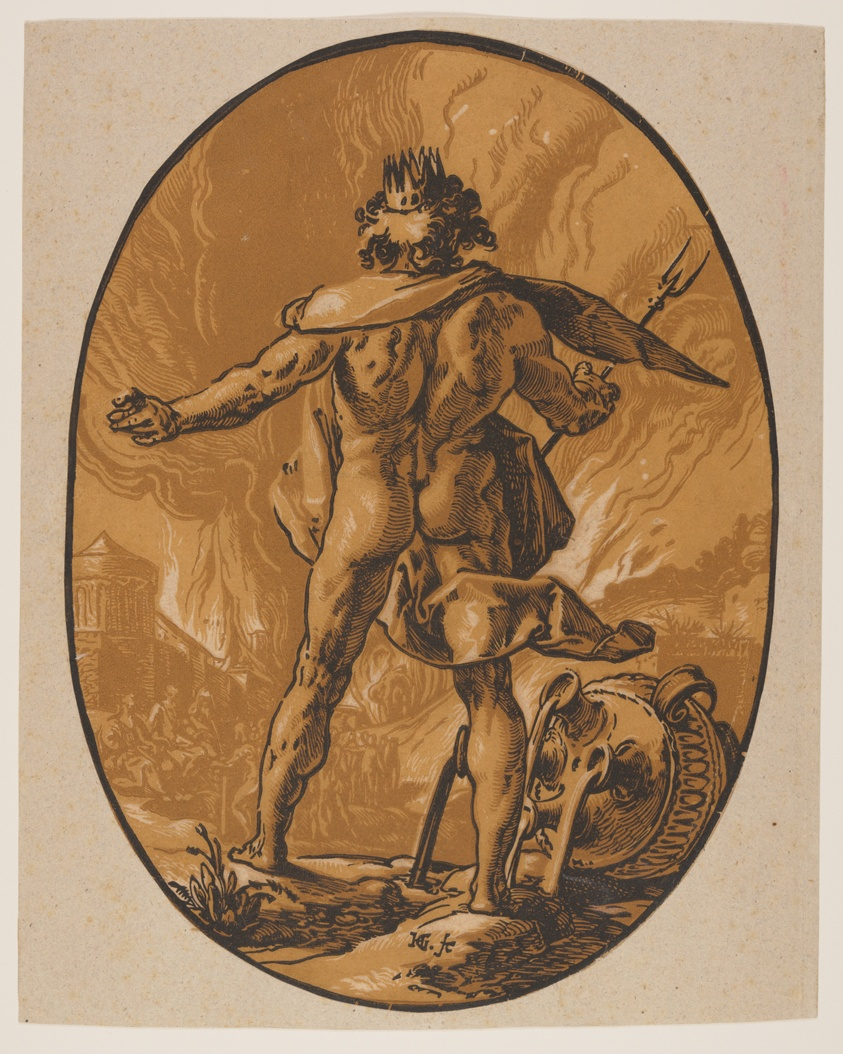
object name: Print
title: Pluto, from The Deities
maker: Hendrick Goltzius (Dutch, 1558–1617)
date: 1588/90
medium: Chiaroscuro woodcut from three blocks in ochre and brown on ivory laid paper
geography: Netherlands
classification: print; paper; prints and drawing; woodcut